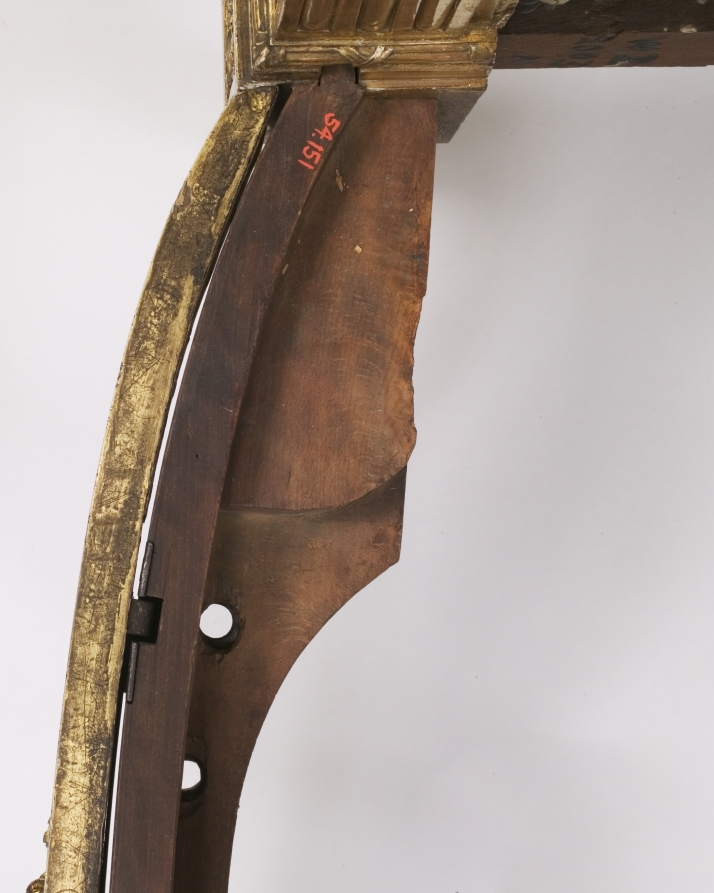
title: Bed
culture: France, 18th century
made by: attributed to Georges Jacob (French, 1739–1814)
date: 1700s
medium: gilded wood and embroidered satin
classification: Furniture and woodwork